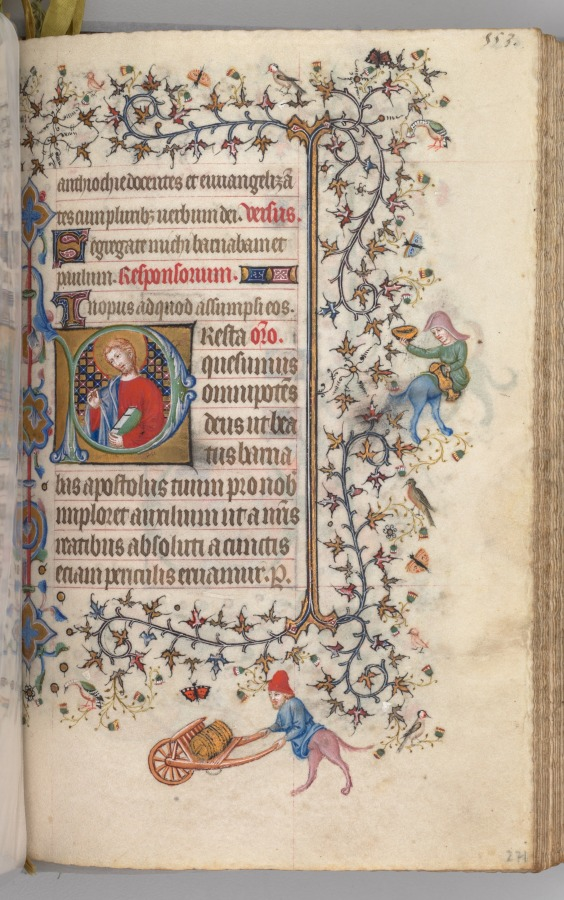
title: Hours of Charles the Noble, King of Navarre (1361-1425): fol. 271r, St. Barnabus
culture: France, Paris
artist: Master of the Brussels Initials and Associates (French)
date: c. 1405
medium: ink, tempera, and gold on vellum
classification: Bound Volume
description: This precious volume was obviously highly prized by its owner, the French-born King of Navarre, who had his coat of arms painted on no less than twenty folios. Rather than directly commissioning this manuscript from a specific workshop, it seems that Charles the Noble acquired his book of hours -- perhaps ready-made for the luxury market -- while on a trip to Paris in 1404-05. A collaborative effort, six painting styles are evidenced within the pages of this codex, those of two Italians, two Frenchmen, and two Netherlanders. The painter who was responsible for the planning and decoration of the book, and who produced seventeen of the large miniatures, was a Bolognese artist known as the Master of the Brussels Initials. His principal assistant, responsible for most of the borders, was a Florentine who signed his name "Zecho" da Firenze on folio 208 verso.